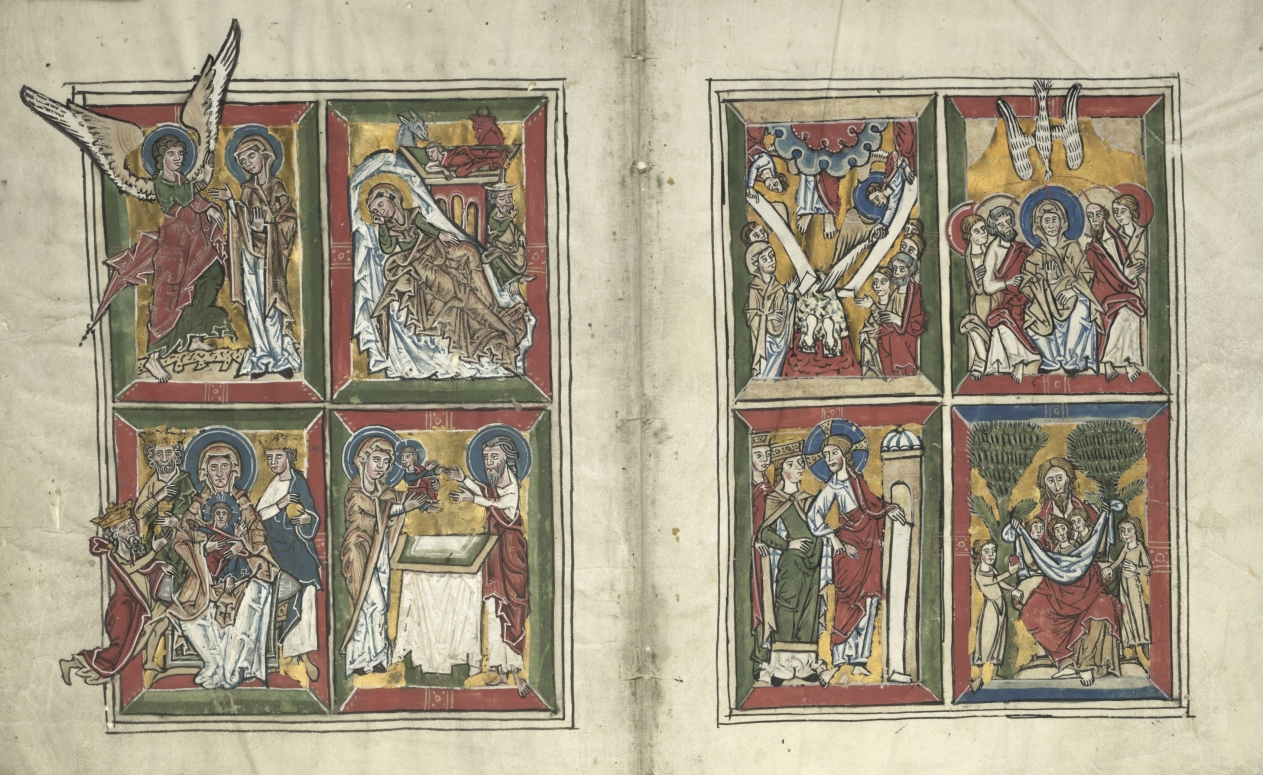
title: Bifolia with Scenes from the Life of Christ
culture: Germany, Lower Saxony (Diocese of Hildesheim), Braunschweig(?), 13th century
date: 1230–1240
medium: tempera, and gold on vellum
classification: Manuscript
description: A sheet of vellum (animal skin) folded down the center to create two leaves, or folios, is called a bifolium (plural: bifolia). This pair of bifolia originally were to have been inserted one inside the other, forming part of a large psalter, or book of the psalms. The small paintings, called miniatures, decorating each leaf are subdivided into four small panels and illustrate the life of Christ. This particular format, along with the style of decoration, tells us that the psalter was made in North Germany, in the Diocese of Hildesheim. In northern Europe, after 1050, a tradition emerged of illustrating psalters with scenes of the life of David (the author of the Psalms) and the life of Christ. This juxtaposition implied a shared ancestry, since Christ was a descendant of the House of David. In the parent volume these miniatures may have been accompanied by a David cycle.